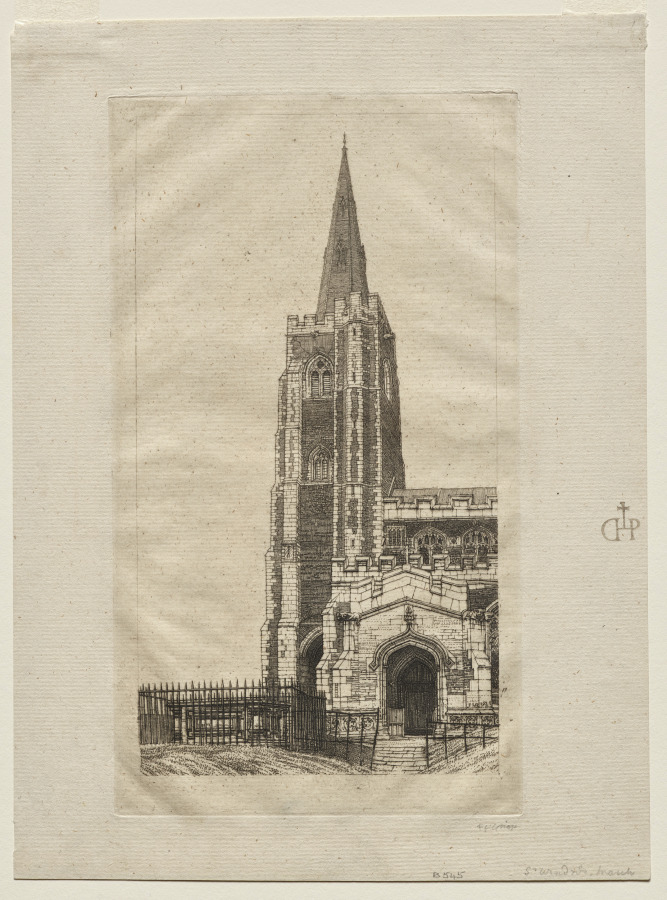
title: St. Wendred's March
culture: England, 20th century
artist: Frederick Landseer Maur Griggs (British, 1876–1938)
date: 1922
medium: etching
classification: Print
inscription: signed in graphite, lower right margin: F.L. Griggs